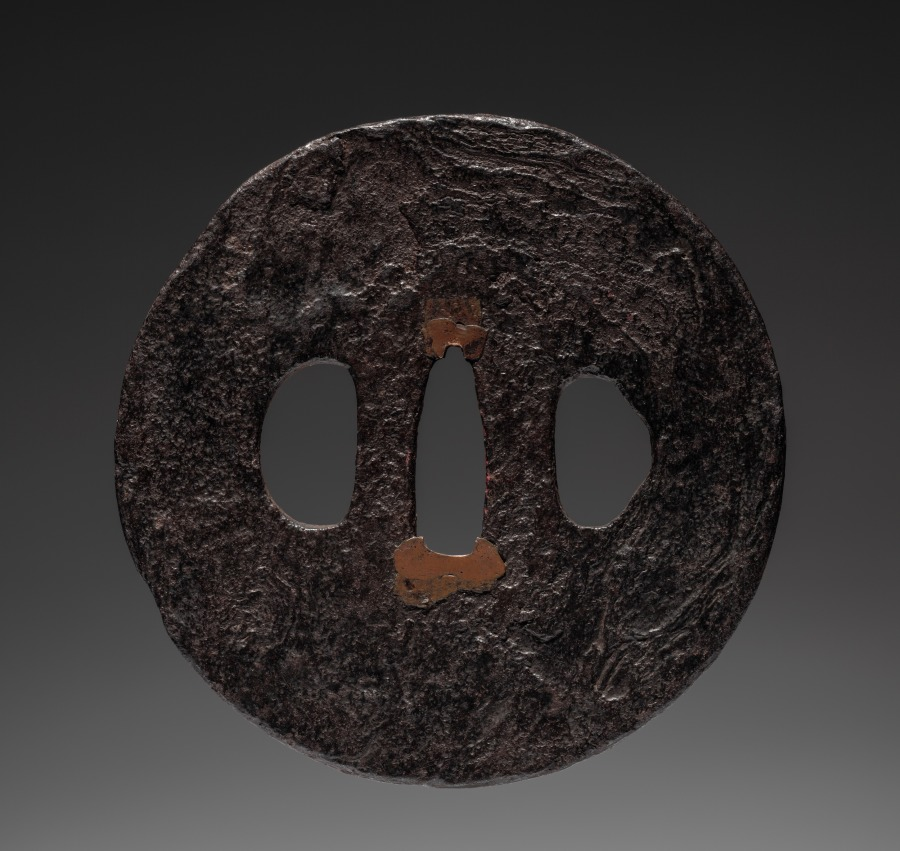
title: Sword Guard (Tsuba)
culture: Japan, possibly Edo period (1615-1868)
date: c. 1615–1868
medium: iron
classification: Arms and Armor